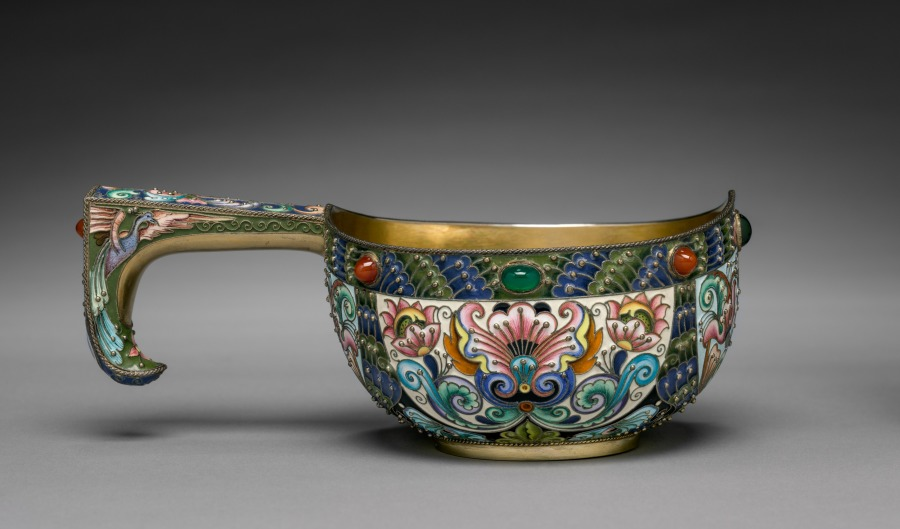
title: Kovsh (Wine Vessel)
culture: Russia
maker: House of Fabergé (Russian, 1842–1918)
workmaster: attributed to Feodor Ivanovich Rückert (Russian, 1840–1917)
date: 1896–1906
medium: silver gilt, enamel, cabochon gems, chrysoprases, carnelians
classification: Miscellaneous